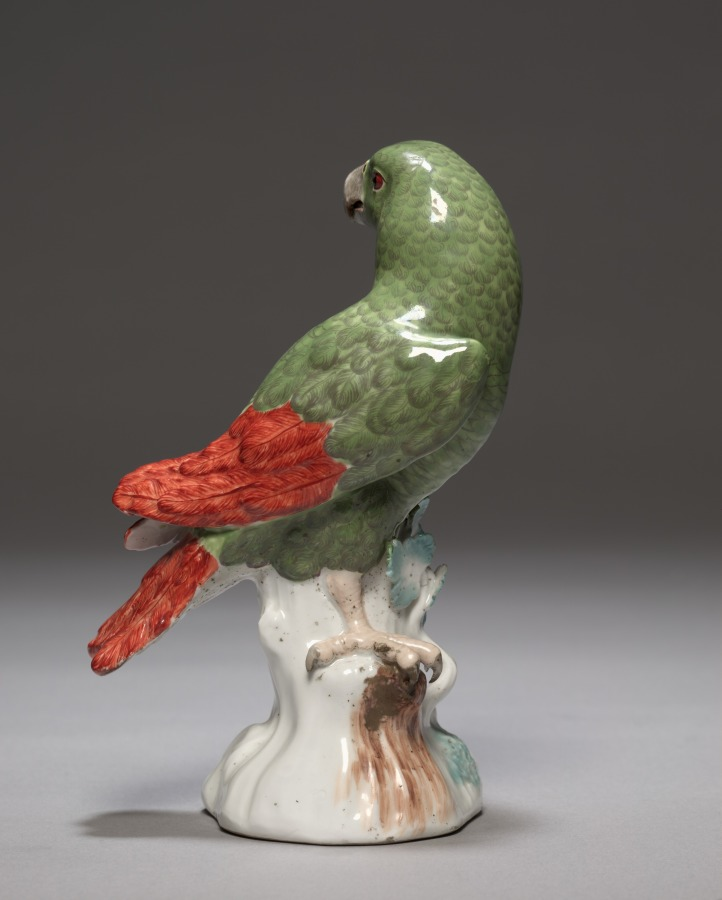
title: Candelabrum with Parrot (Parrot)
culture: Germany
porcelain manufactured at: Meissen Porcelain Factory (German, est. c. 1710)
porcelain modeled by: Johann Joachim Kändler (German, 1706–1768)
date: c. 1740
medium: porcelain mounted in gilt bronze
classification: Ceramic